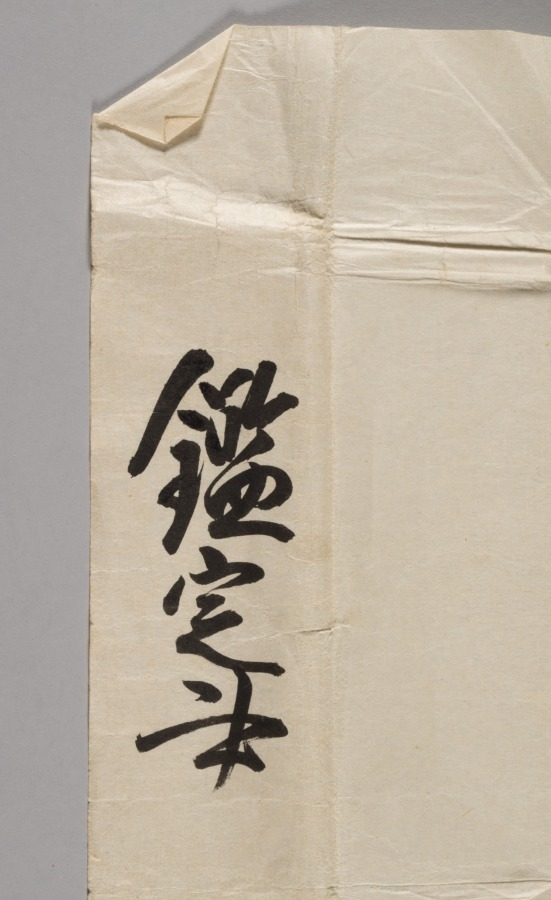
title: Sparrows on Blossoming Plum; A Sage with Tiger; Chinese Bird on Snow-Laden Branch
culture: Japan, Edo period (1615–1868)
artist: Kano Tan’yū (Japanese, 1602–1674)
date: 1661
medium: Triptych of hanging scrolls; ink and slight color on silk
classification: Painting